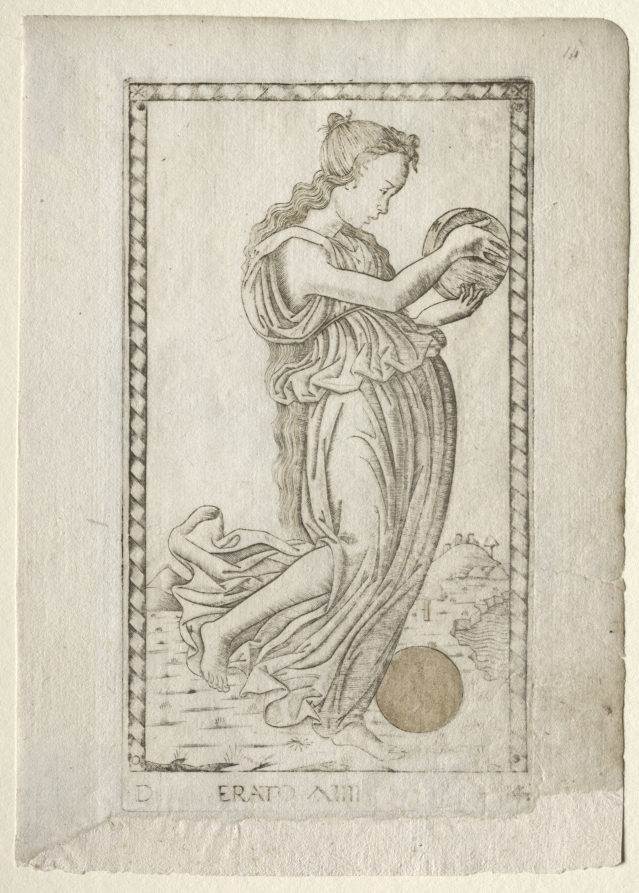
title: Erato (lyric and love poetry) (from the Tarocchi series D: Apollo and the Muses, #14)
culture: Italy, Ferrara, 15th century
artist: Master of the E-Series Tarocchi (Italian, active 1460s)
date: before 1467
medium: engraving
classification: Print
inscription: Lettered below the image of Earto (Lyric and Love Poetry): ·D·/ ·ERATO XIIII / [14]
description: This engraving is part of the Tarocchi group marked with the letter “D,” and named Apollo and the Muses. In Greek mythology, the nine Muses (Calliope, Urania, Terpsichore, Erato, Polyhymnia, Thalia, Melpomene, Euterpe, and Clio) were the daughters of Zeus, king of the gods, and Mnemosyne, the Titaness of memory. The Muses were goddesses presiding over different branches of the arts and sciences. Their leader and supervisor was Apollo, the god of light, music, prophecy, and poetry. Here, Erato is personified as a full-length female figure, in profile to the right, and set in an imaginary landscape. Her dancelike pose and the tambourine she carries suggest that she is the Muse of the dance. Erato was also regarded as the Muse of lyric and love poetry.